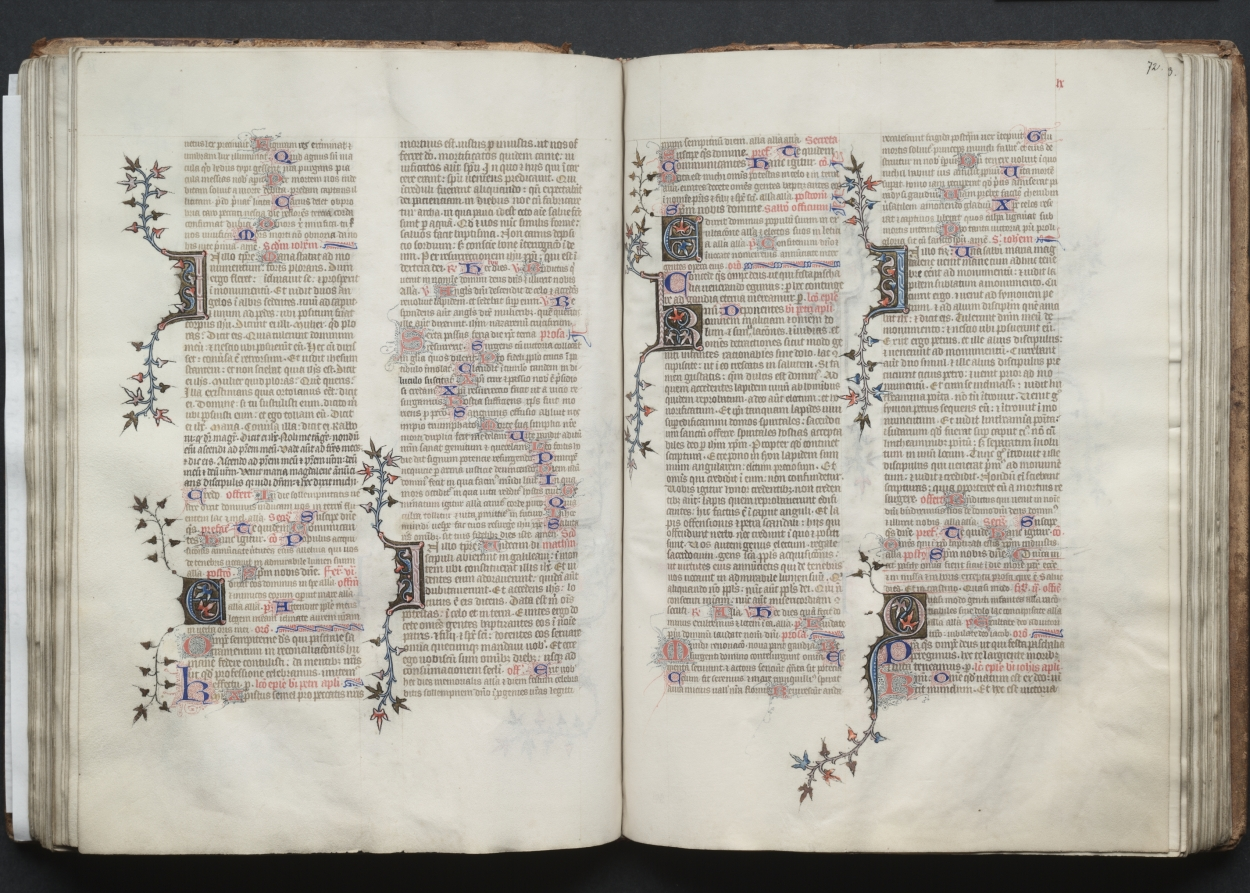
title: The Gotha Missal: Fol. 71v, Text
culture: France, Paris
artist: Master of the Boqueteaux (French)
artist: and Workshop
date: c. 1375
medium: ink, tempera, and gold on vellum; blind-tooled leather binding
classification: Bound Volume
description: The style and quality of this manuscript's decoration is typical of deluxe Parisian books made for aristocratic or royal patrons. Most of the book's decoration appears to be the work of the Master of the Boqueteaux, an artist active at the court of King Charles V (died 1380). His style was apparently shared by a number of book illuminators working in and around Paris. It is very possible that the Gotha Missal belonged to Charles V, but is not provable because the manuscript has no royal portraits and lacks a colophon. Given the book's magnificent decoration, however, it would seem that it was produced for a Valois prince, if not for the king himself. The manuscript receives its name from the German dukes of Gotha, its later owners.